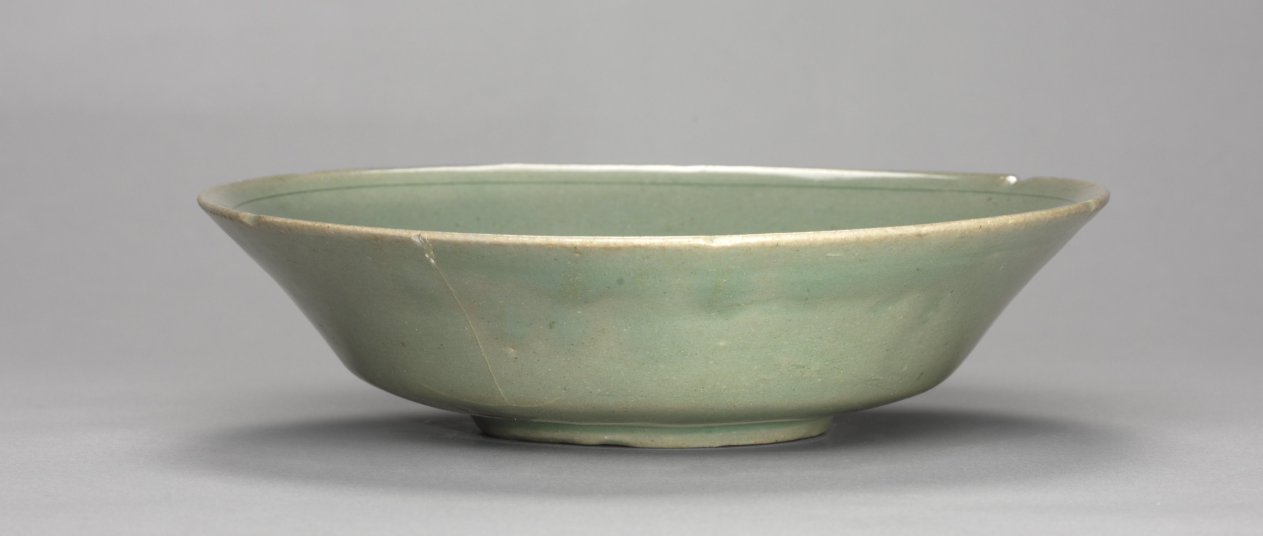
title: Dish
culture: Korea, Goryeo dynasty (918–1392)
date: 1100s-1200s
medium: pottery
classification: Ceramic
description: Celadons wares used for everyday such as this dish were among the most common burial objects in tombs during the Goryeo period (918–1392). Furnishing tombs with an elaborate assemblage of objects was believed to honor and comfort the newly dead. Generally, Goryeo tombs were left untouched until the late 1800s. During the colonial period (1910–45), however, Japanese archaeologists competitively excavated the tombs located in Kaeseong, the former capital of the Goryeo period, and soon began making tomb goods available for Japanese and Western collectors.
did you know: On the base of this dish, three spur marks made of bits of clay remain visible.